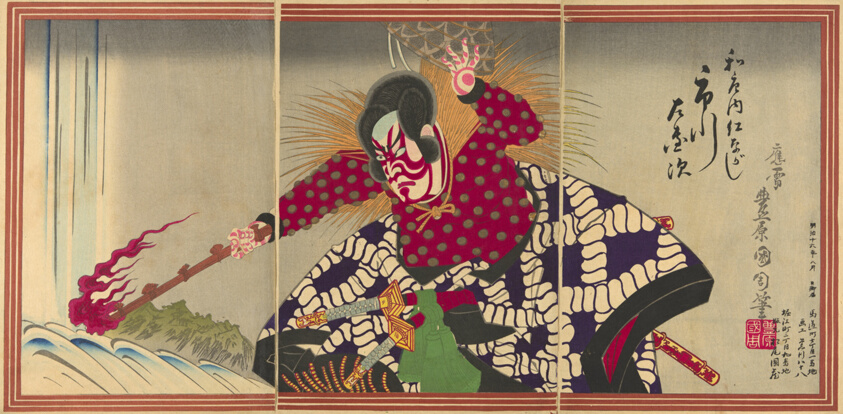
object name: Print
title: The actor Ichikawa Sadanji I as Watonai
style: Japanese (culture or style)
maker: Toyohara Kunichika (Japanese, 1835-1900)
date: 1883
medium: Color woodblock print; oban triptych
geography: Japan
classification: woodblock print; print; asian art